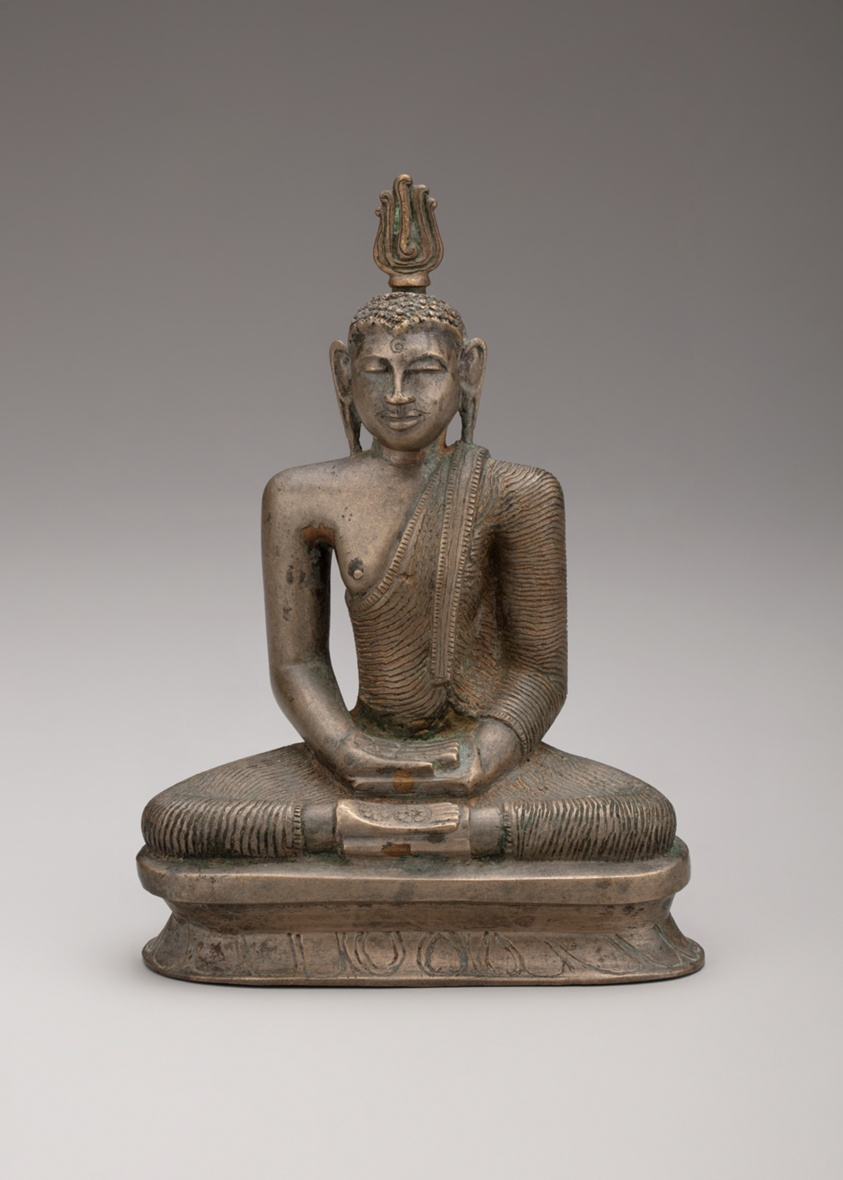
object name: Sculpture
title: Buddha Seated in Meditation (Dhyanamudra)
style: South Asian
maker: Sri Lanka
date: Kandyan period, 18th century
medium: Bronze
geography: Sri Lanka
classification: bronze; metal; sculpture; asian art